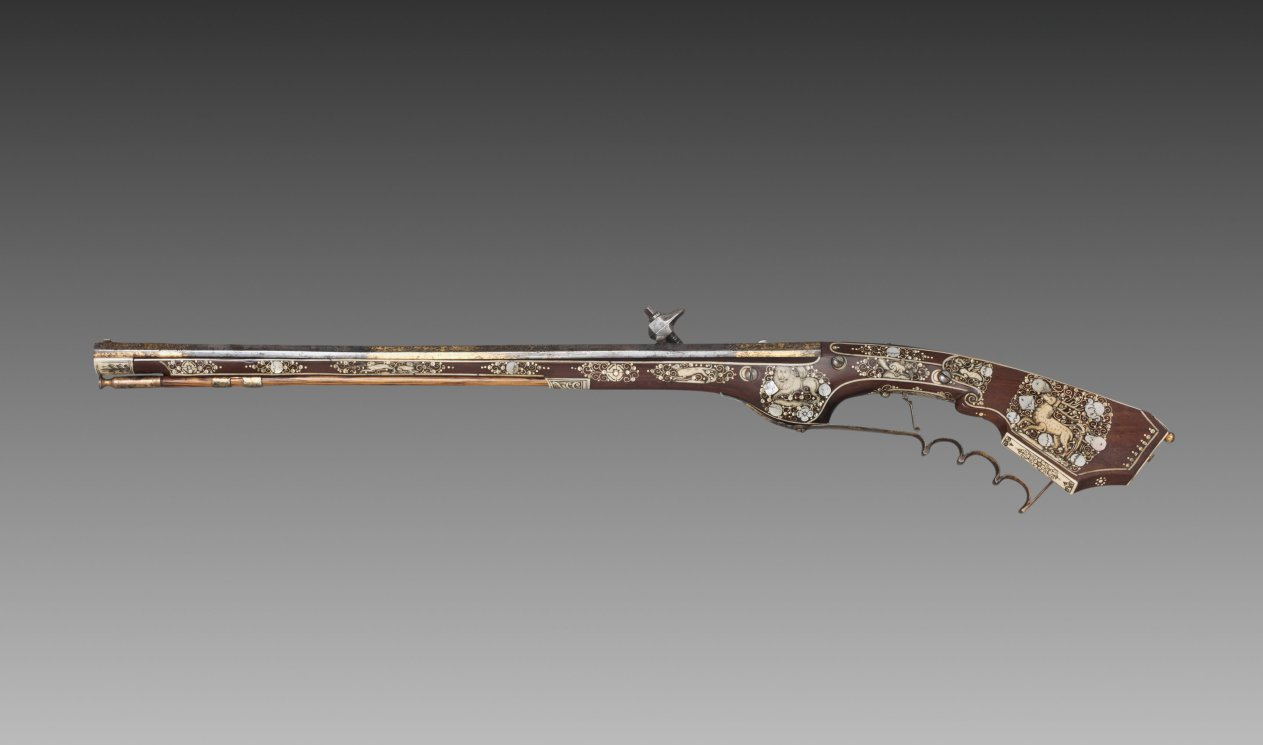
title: Wheel-lock Petronel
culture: Silesia (Southwestern Poland), Teschen, 17th century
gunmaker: Georg Kurland (Polish)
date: c. 1630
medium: steel, gilding, and wood inlaid with elk horn, ivory, and mother-of-pearl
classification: Arms and Armor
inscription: Georg Kurland (signed)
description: A petronel was a type of long pistol made with a wheel-lock ignition. Despite its length, the petronel was fired at the wrist like a pistol and not at the shoulder like a rifle. They were generally made in pairs during the early 1600s. Civilian versions were elaborately decorated for aristocratic clients.